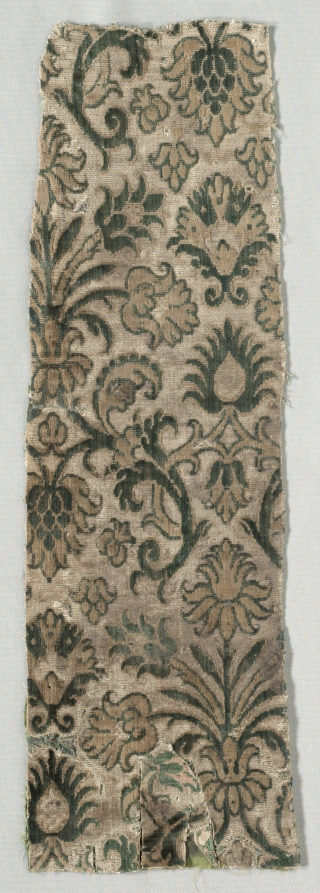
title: Velvet Fragment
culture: Italy, early 17th Century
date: c. 1600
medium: velvet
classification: Velvet